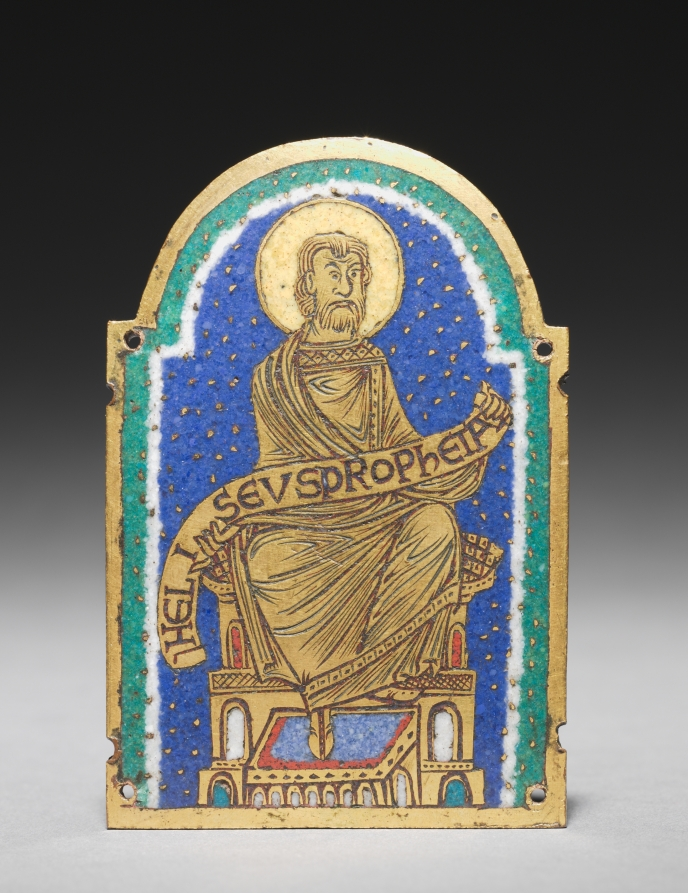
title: Plaque with Seated Prophet from a Reliquary Shrine: Heliseus (Elisha)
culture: Germany, Lower Saxony, Hildesheim, Romanesque period, 12th century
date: c. 1170–80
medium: gilded copper, champlevé enamel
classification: Enamel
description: Once used as decorations for a reliquary shrine, each enamel plaque represents a biblical prophet: Isaiah, Obadiah, Elisha, and Hosea. Fine gold dots punctuate dark blue backgrounds. Typical of Hildesheim enamels, this detailing creates the illusion that the prophets sit against star-studded twilight skies.